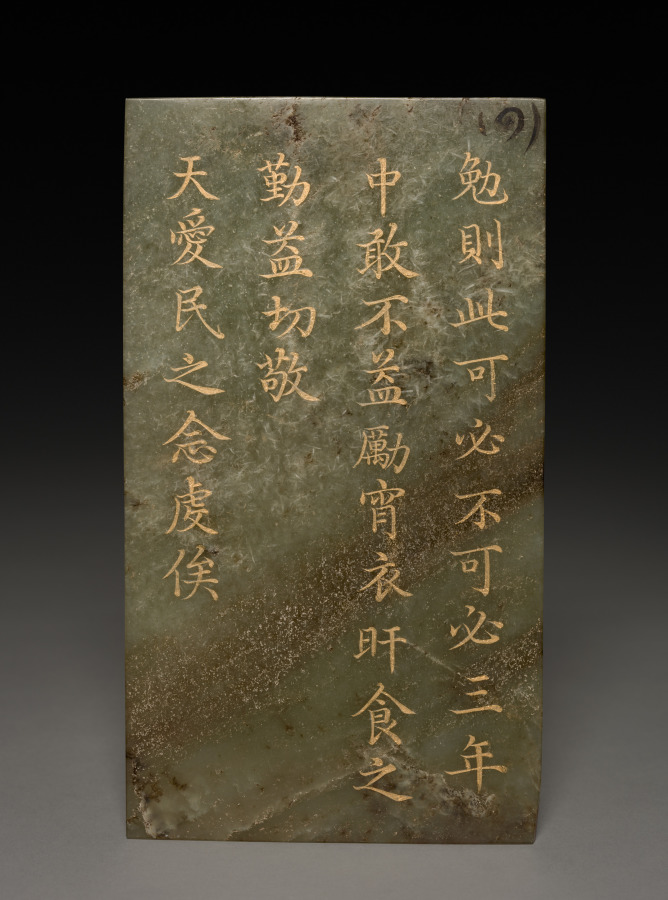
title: Tablet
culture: China, Qing dynasty (1644–1911), Qianlong reign (1736–95)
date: 1778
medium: jade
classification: Jade